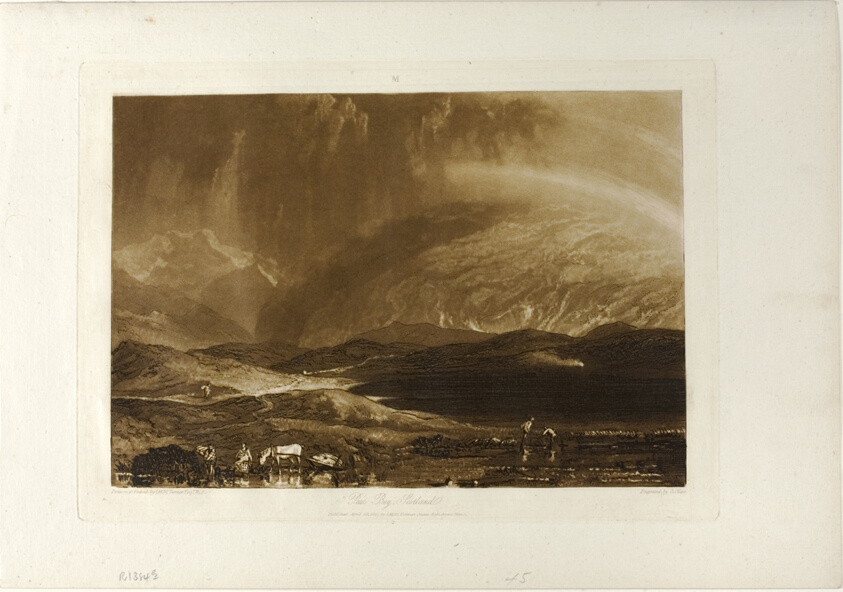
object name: Print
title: Peat Bog, Scotland, plate 45 from Liber Studiorum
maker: Joseph Mallord William Turner (English, 1775-1851); Engraved by G. Clint (English, 1770-1854)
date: published April 23, 1812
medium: Etching and engraving in brown on ivory laid paper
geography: England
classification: etching; print; prints and drawing